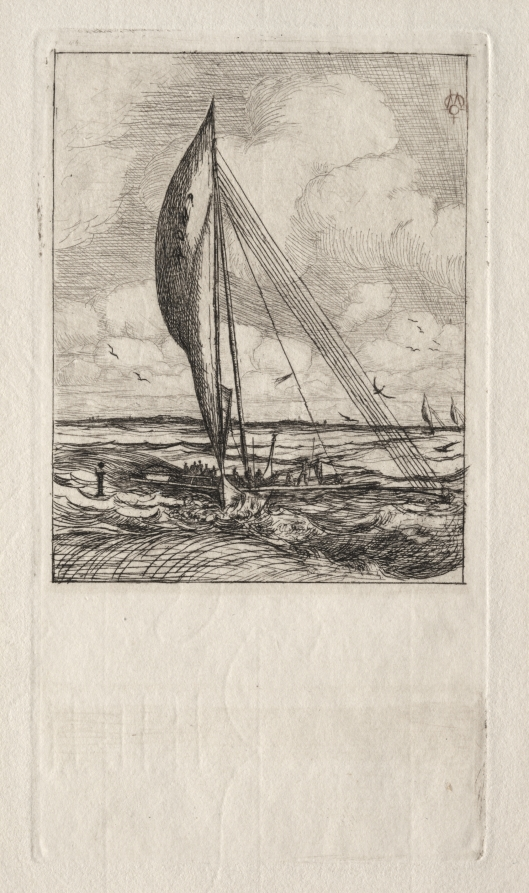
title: Swift Sailing Proa, Mulgrave Archipelago, Oceania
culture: France, 19th century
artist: Charles Meryon (French, 1821–1868)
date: 1866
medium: etching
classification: Print